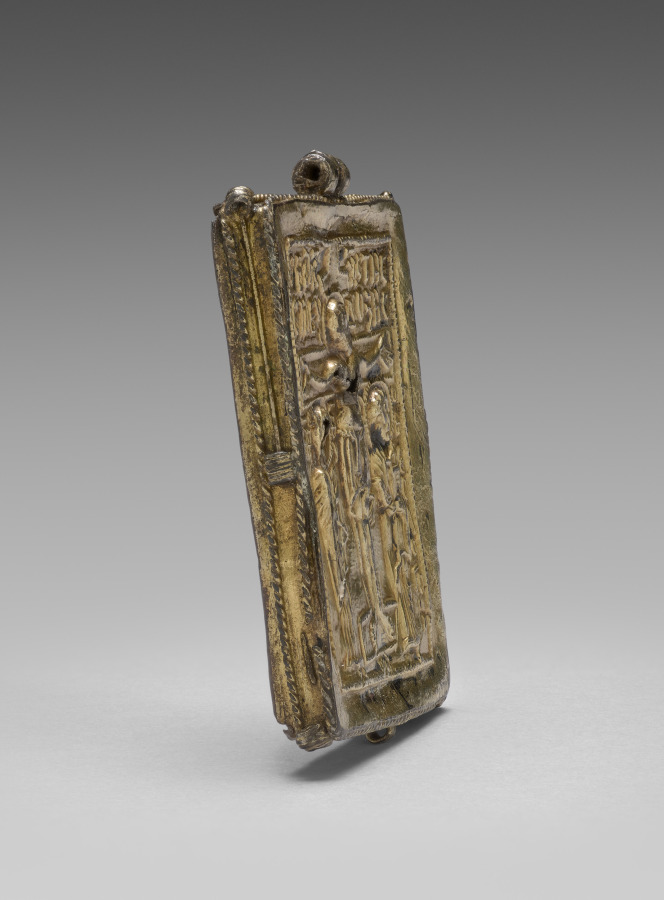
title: Enkolpion with the Crucifixion (front) and Saints Theodore and George (back)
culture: Byzantium, Constantinople, Byzantine period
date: 1080–1120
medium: silver gilt and cloisoné enamel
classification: Metalwork